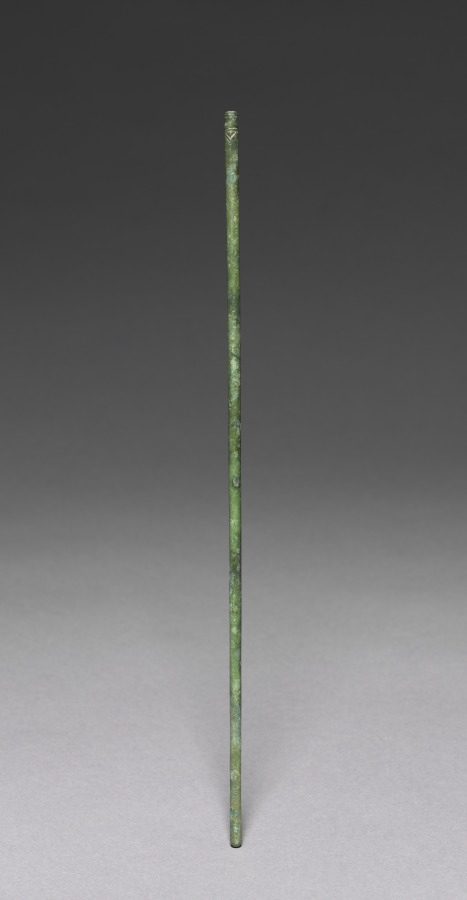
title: A Pair of Chopsticks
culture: Korea, Goryeo dynasty (918–1392)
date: 918–1392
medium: bronze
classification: Metalwork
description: In Korea, chopsticks made of metal such as brass, silver, and gold were excavated from ancient tombs and ruins dated to the 6th century at the earliest. Burial goods often include utilitarian objects such as table wares and utensils because the dead were believed to need them in the afterlife.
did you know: Nowadays Korean still prefer metal chopsticks (stainless steel and brass) to wooden ones.